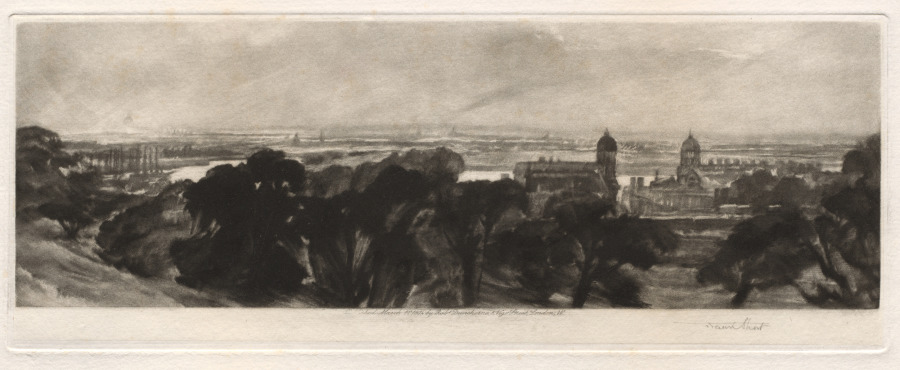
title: London from Greenwich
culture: England, 20th century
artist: Frank Short (British, 1857–1945)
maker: after Peter De Wint (British, 1784–1849)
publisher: Robert Dunthorne, London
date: 1904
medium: mezzotint on chine collé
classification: Print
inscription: Below image: ...Published March 11 1904 by Rob Dunthorne, 5, Vigo Street, London, W.; lower right, in graphite: Frank Short